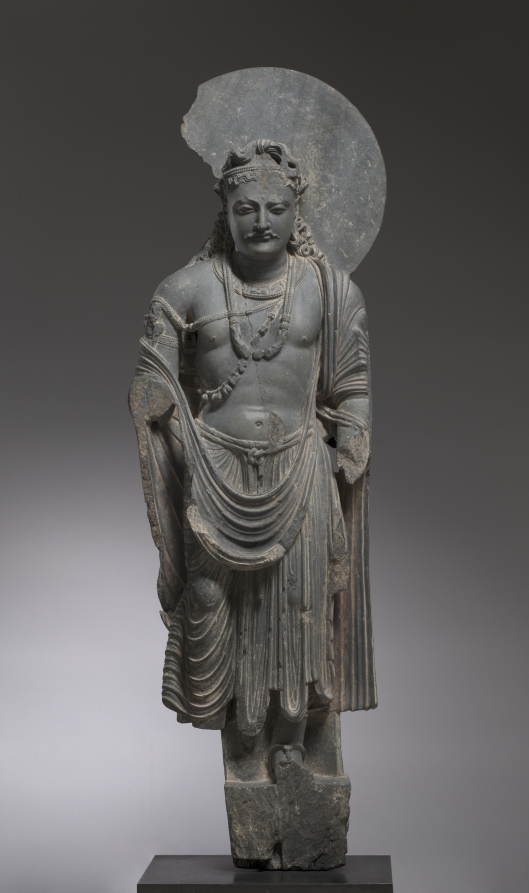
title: Bodhisattva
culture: Pakistan, Gandhara, Kushan period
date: late 100s CE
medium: schist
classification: Sculpture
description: Bodhisattvas, who are one stage away from complete enlightenment, are depicted as royal figures because the Buddha himself was a prince before he renounced that life and finally achieved enlightenment. He wears elaborate jewelry, including a string of amulets diagonally across his chest. The garments are Indian, but the muscular torso is derived from Greco-Roman sources.